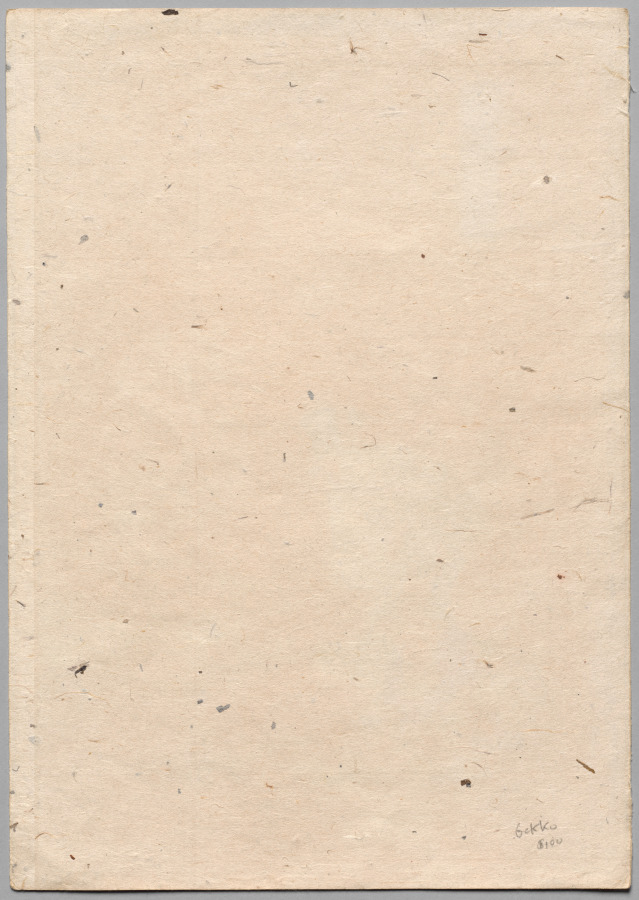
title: Beauties Harvesting Bracken, from the series Gekkō’s Miscellaney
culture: Japan, Meiji period (1868–1912)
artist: Ōgata Gekkō (Japanese, 1859–1920)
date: c. 1886–1899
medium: Woodblock print, ink and color on paper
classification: Print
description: The print series Gekkō’s Miscellaney wanders through a variety of genres. This print captures an agricultural scene of women gathering bracken. Ōgata Gekkō distinguished himself as a younger artist in the first exhibition of the Painting Appreciation Society (Kangakai) in 1885. He went on to earn prizes at world’s fairs and expositions in both the US and Europe.